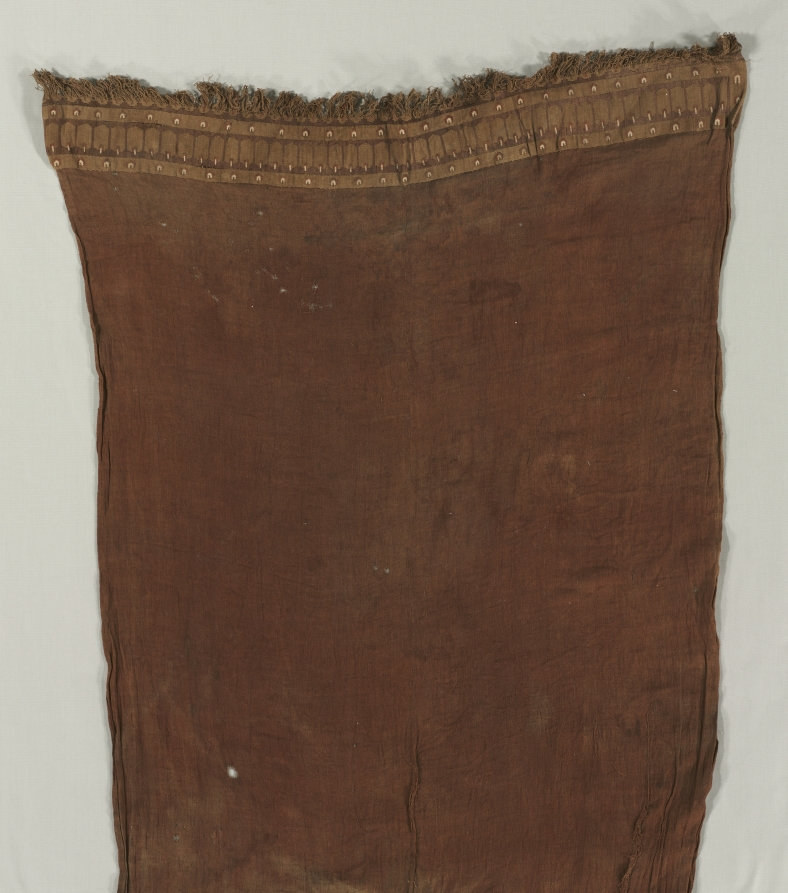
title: Loincloth with Feather(?) Motifs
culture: Peru, Central Andes, Chimú or Chimú-Inka, 11th-16th century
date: 1000–1532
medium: plain weave, tapestry weave; cotton, camelid fiber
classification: Textile